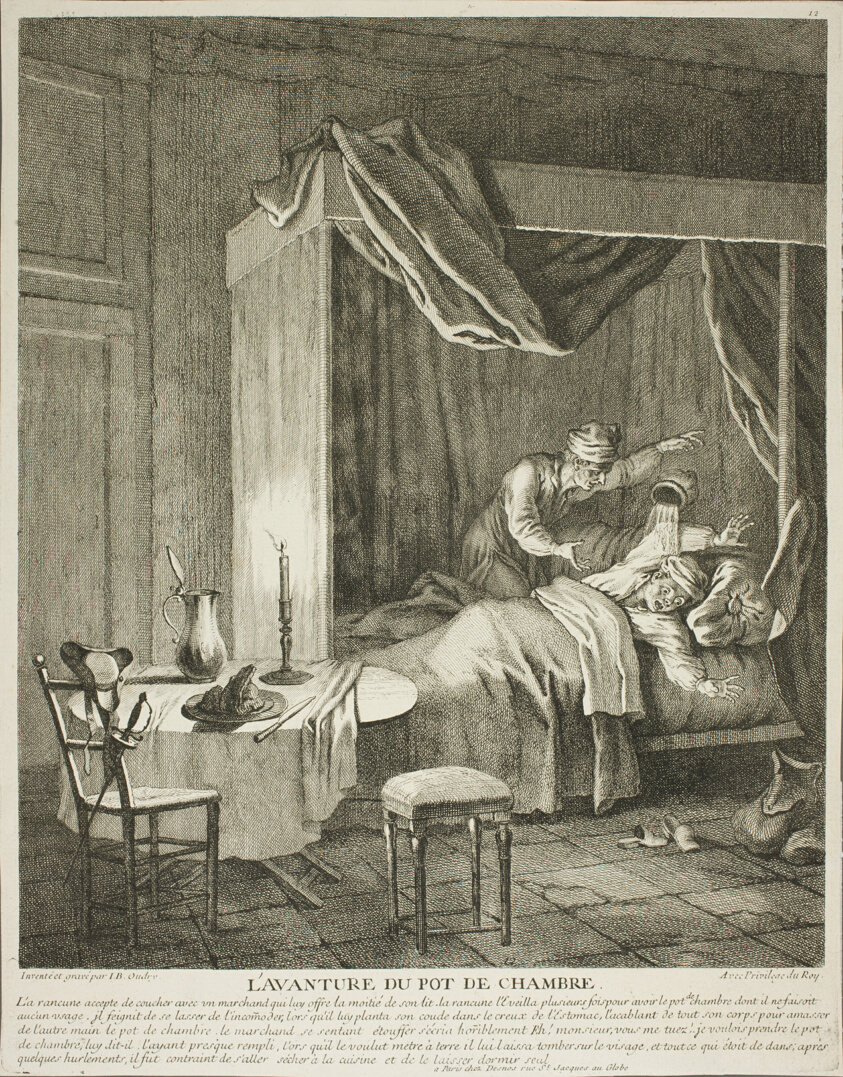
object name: Print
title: The Adventure of the Chamber Pot, plate four from Scènes du Roman Comique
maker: Jean-Baptiste Oudry (French, 1686-1755)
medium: Etching on ivory laid paper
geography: France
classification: etching; print; prints and drawing